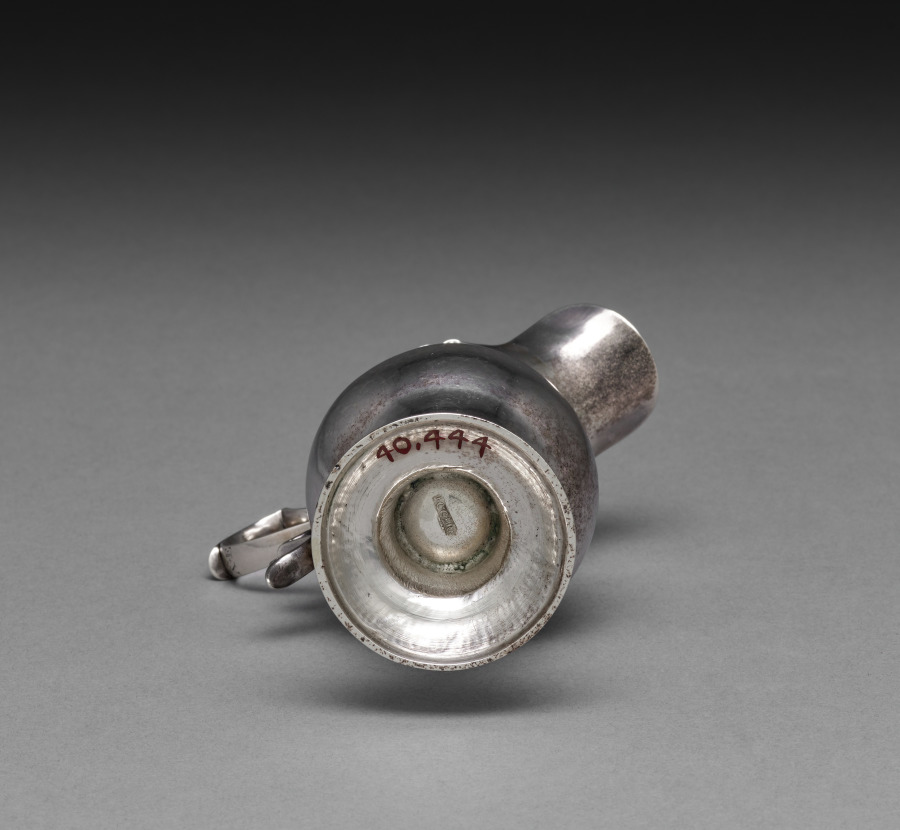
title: Cream Jug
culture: America, Massachusetts, Boston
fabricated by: John Coburn (American, 1725–1803)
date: c. 1780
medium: silver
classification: Silver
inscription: engraved: "W" over "A + E" in block letters on handle, below grip.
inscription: Stamped underside: "I.Coburn"